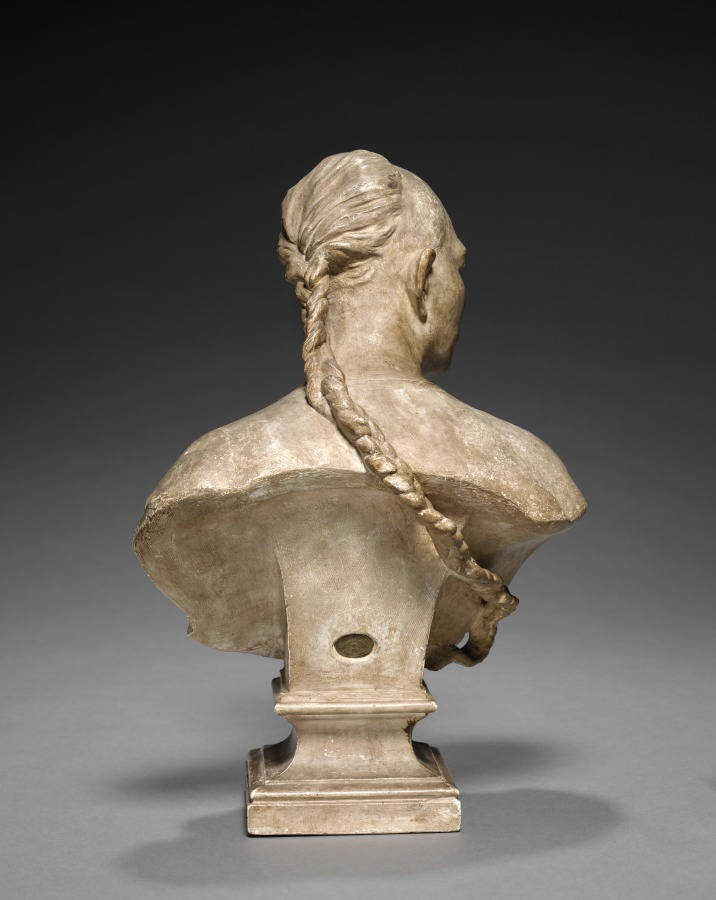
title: Bust of a Chinese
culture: France, 19th century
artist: Jean-Baptiste Carpeaux (French, 1827–1875)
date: 1867–68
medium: plaster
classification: Sculpture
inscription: inset into bust near base at rear is struck copper plate inscribed: "PROPRIETE CARPEAUX" with an eagle in the center.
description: This bust is related to the allegorical figure of Asia in Carpeaux's monumental bronze fountain, The Four Parts of the World Upholding the Celestial Sphere, commissioned by Baron Haussmann in 1867 for the Luxembourg Gardens in Paris. The figure was changed into a woman in the fountain and reflects the artist's interest in accurately portraying different ethnic groups. This bust exists in various sizes and media.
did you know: Greatly admired during his time, Jean-Baptiste Carpeaux received important commissions from French Emperor Napoleon III and Baron Georges-Eugène Haussmann.